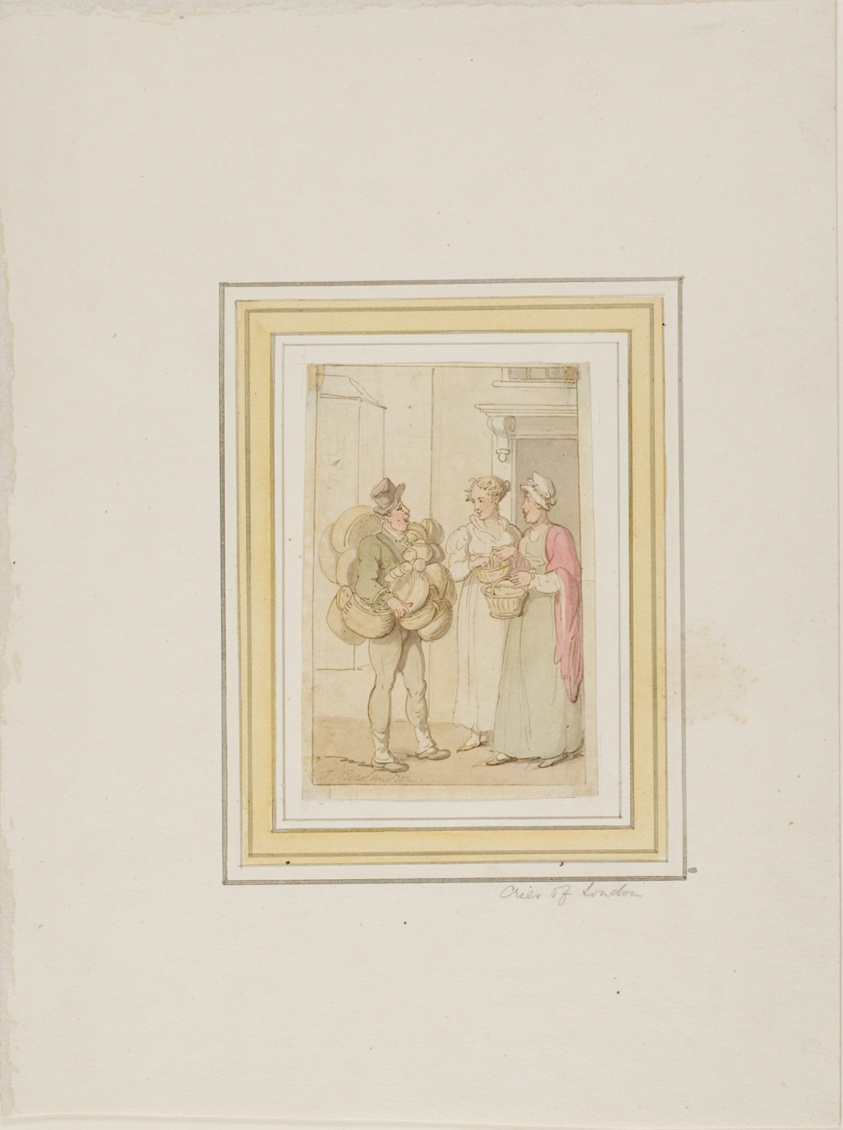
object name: Drawing and Watercolor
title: The Basket Seller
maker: Thomas Rowlandson (English, 1756-1827)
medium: Pen and brown ink with brush and watercolor, over graphite, on ivory wove paper, tipped onto ivory wove paper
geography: England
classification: watercolor; drawings (visual works); prints and drawing